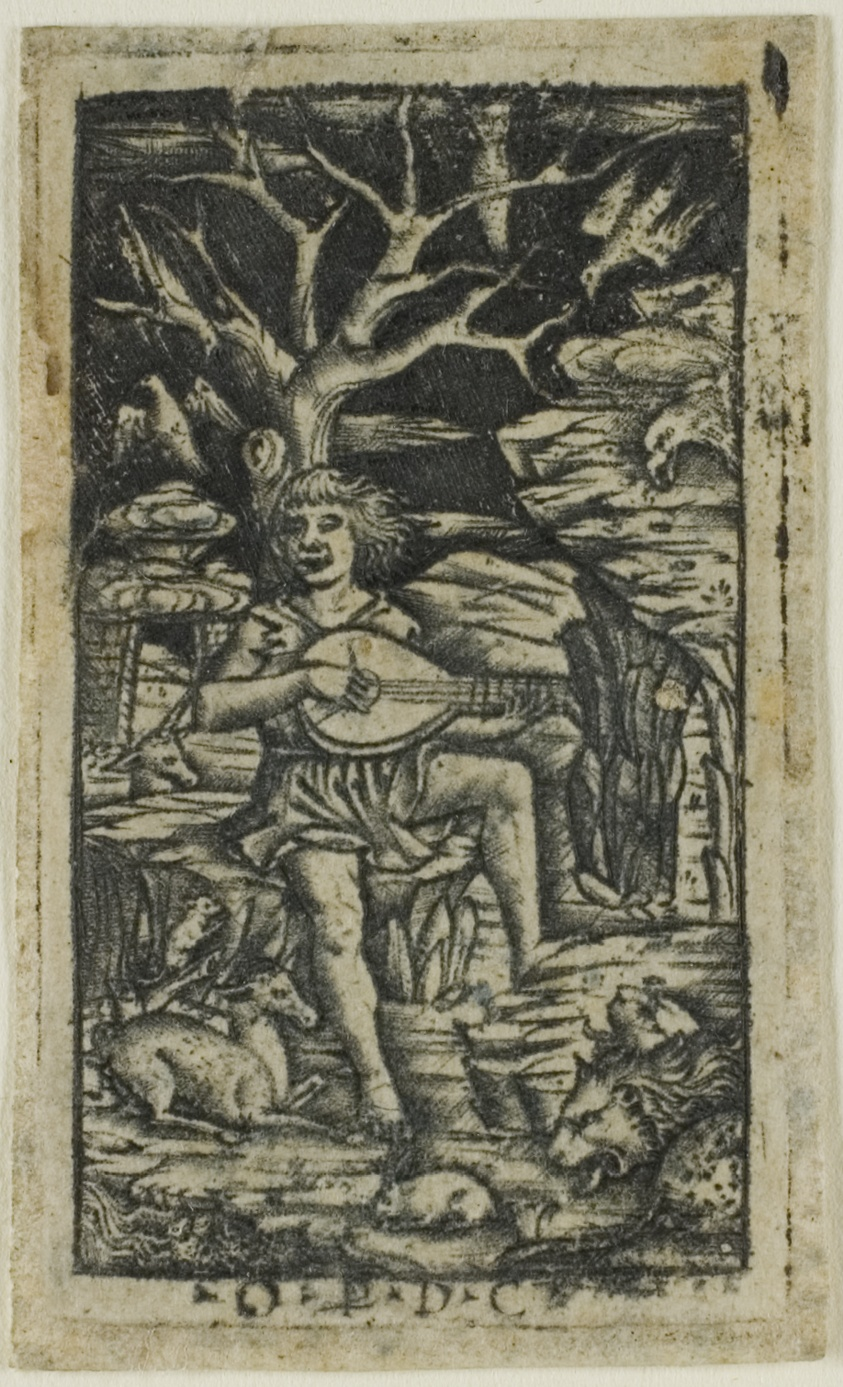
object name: Print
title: Orpheus Charming the Animals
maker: Peregrino da Cesena; Italian, active c. 1490-1520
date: 1490/1510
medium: Engraving in black, from a niello plate, on ivory laid paper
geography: Italy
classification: engraving; print; prints and drawing